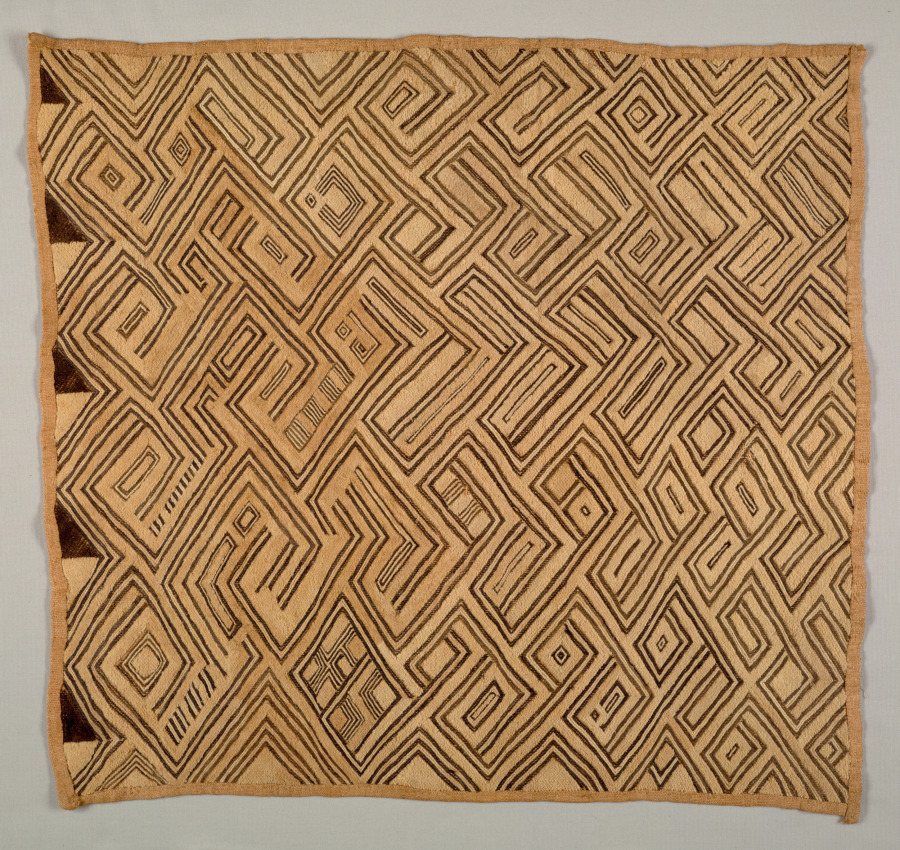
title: Embroidered Raffia Pile Cloth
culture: Africa, Central Africa, Democratic Republic of Congo, Kuba peoples, 20th century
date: 1900s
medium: Raffia and dye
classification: Textile